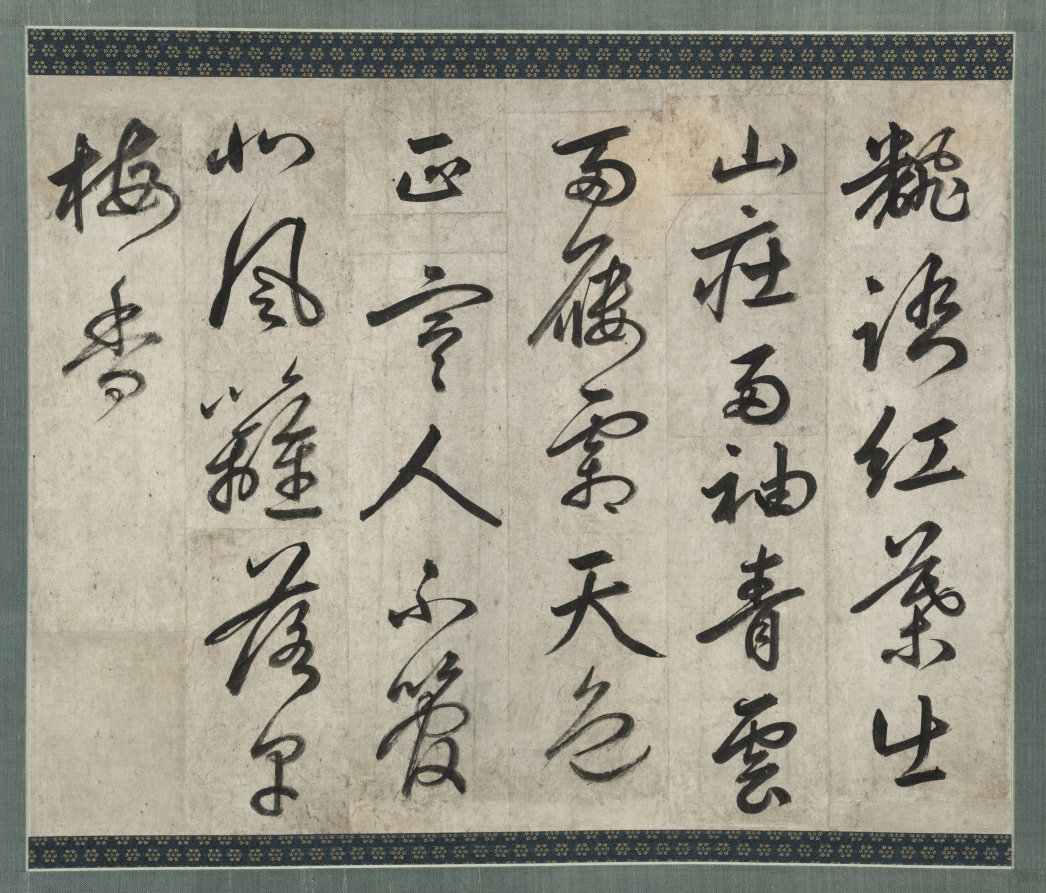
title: Poem on Plum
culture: Korea, Joseon dynasty (1392–1910)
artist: copy after Yi Hwang (Korean, 1501–1570)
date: 1700s–1800s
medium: hanging scroll; ink on paper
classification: Calligraphy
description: For Yi Hwang, a celebrated scholar and poet in 16th-century Korea, writing poems was an escape from partisan politics. Because its flowers often bloom in the middle of winter, Joseon period Korean scholars like Yi found plum blossoms a perfect subject to express the value of endurance and self-cultivation. In his numerous poems, Yi used plum blossom imagery to express his feelings. The poem on this hanging scroll reads: “Wishing to fly away, red leaves left the mountain villa. Their large sleeves are frosted due to blue clouds. The clouds in the sky look upright, which are beyond human beings’ ability. The plum tree whispered to me that [the leaves] fell from the wind and landed on the fence.” The mountain villa in this poem may refer to the Dosan Academy, a Confucian school that Yi established after his retirement, and the red leaves of the plum blossom are probably Yi’s poetic personification.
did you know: Yi Hwang, the author of this calligraphy, composed more than 100 poems on plum blossoms.